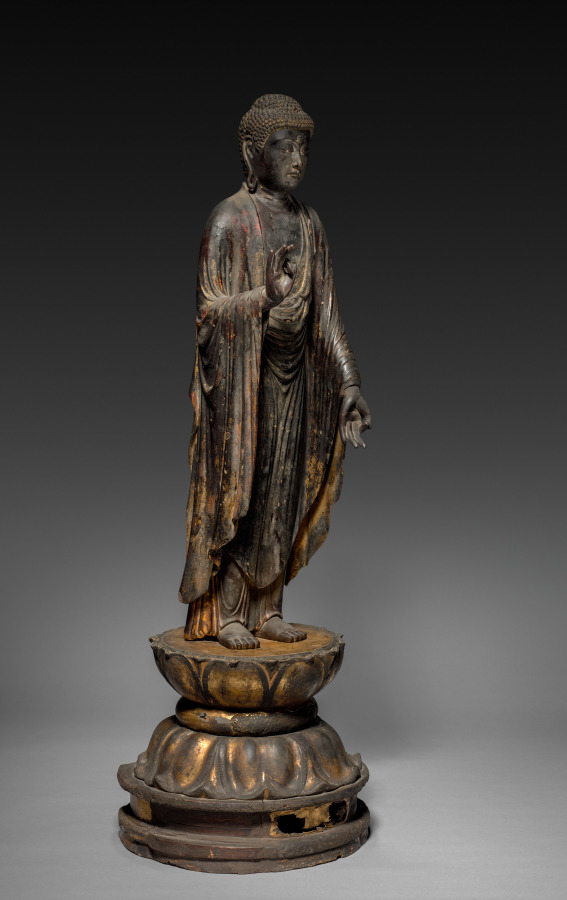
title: Amida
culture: Japan, Kamakura period (1185–1333)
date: 1200s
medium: Wood with lacquer and gilding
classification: Sculpture